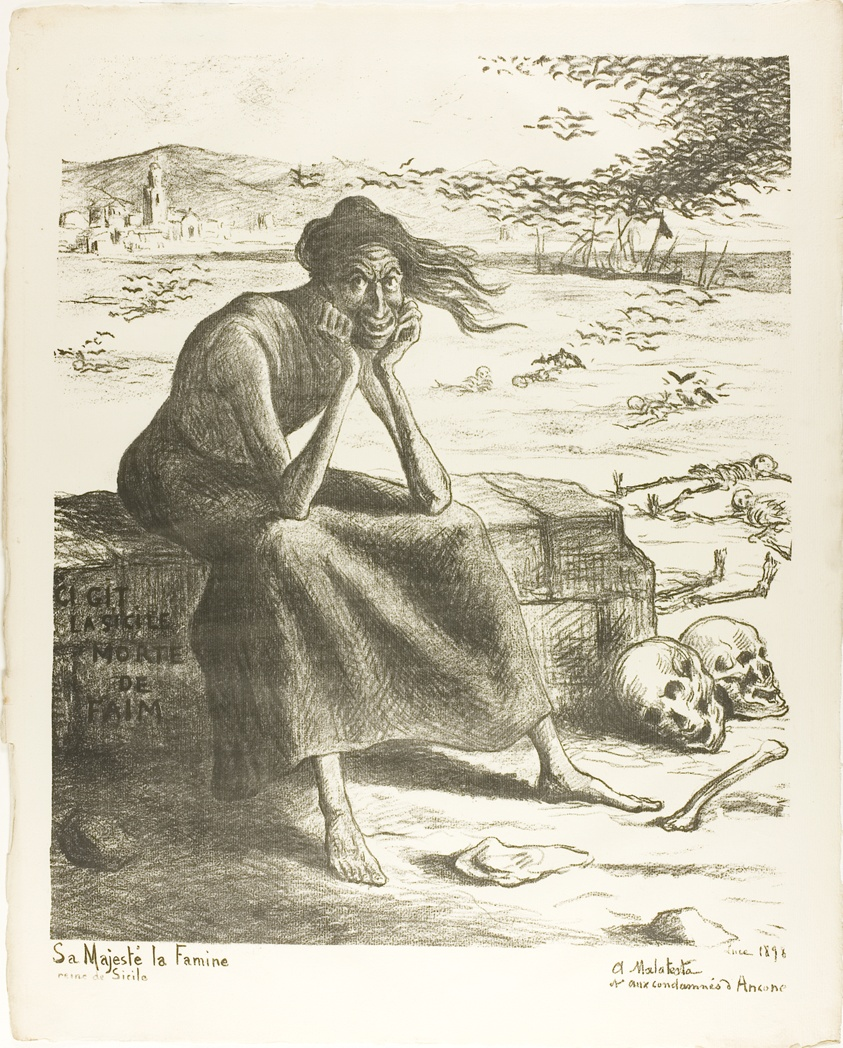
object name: Print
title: Her Majesty Famine, Queen of Sicily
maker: Maximilien Luce (French, 1858-1941)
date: 1898, published May 22, 1898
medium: Lithograph on cream laid paper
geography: France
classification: lithograph; print; prints and drawing